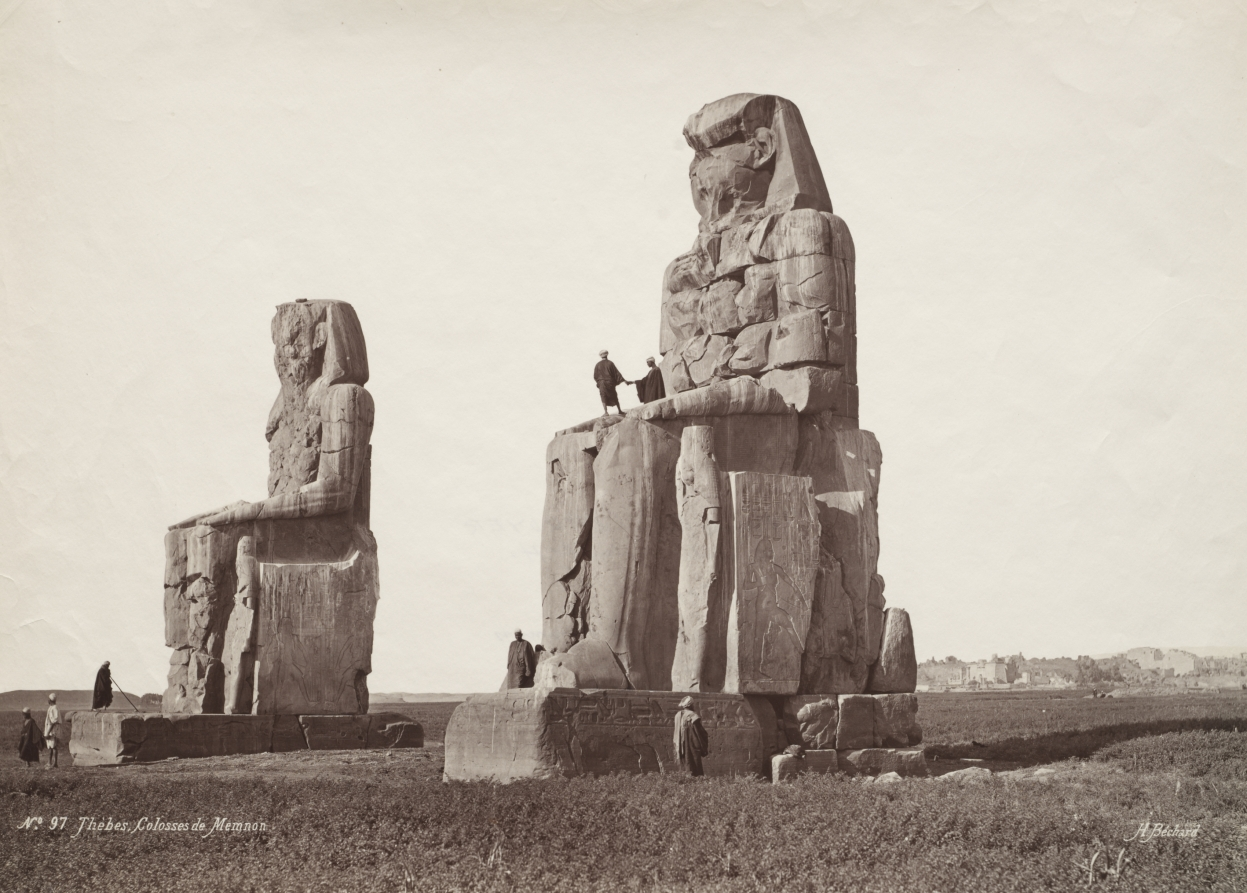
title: Thebes, The Colossi of Memnon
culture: France, 19th century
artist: Henri Béchard (French)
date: 1870s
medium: albumen print from wet collodion negative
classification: Photograph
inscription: Imprinted in white on recto: "No.97 Thebes, Colosses de Memnon H. Bechard" Written in pencil on verso: "No.97/Fiends (?) Ed. CORROYER/Drilitect (?) olly (?) M.H./THEBES/Colosses de Memnon/Li(?) No.97 H.BECHARD"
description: As more photographers shot the same monuments,depictions became formulaic.Numerous photographers produced almost identical images,as demonstrated in these two views of the Colossi of Memnon. Shot from different sides but about the same distance, both images employ an angled view and use Egyptian servants and guides as local color and indexes of scale. Captions and artists’ signatures were often written in reverse on the negatives so that they would automatically become part of each print. Sometimes, as in the Beato image, the artist or his assistant was care less.